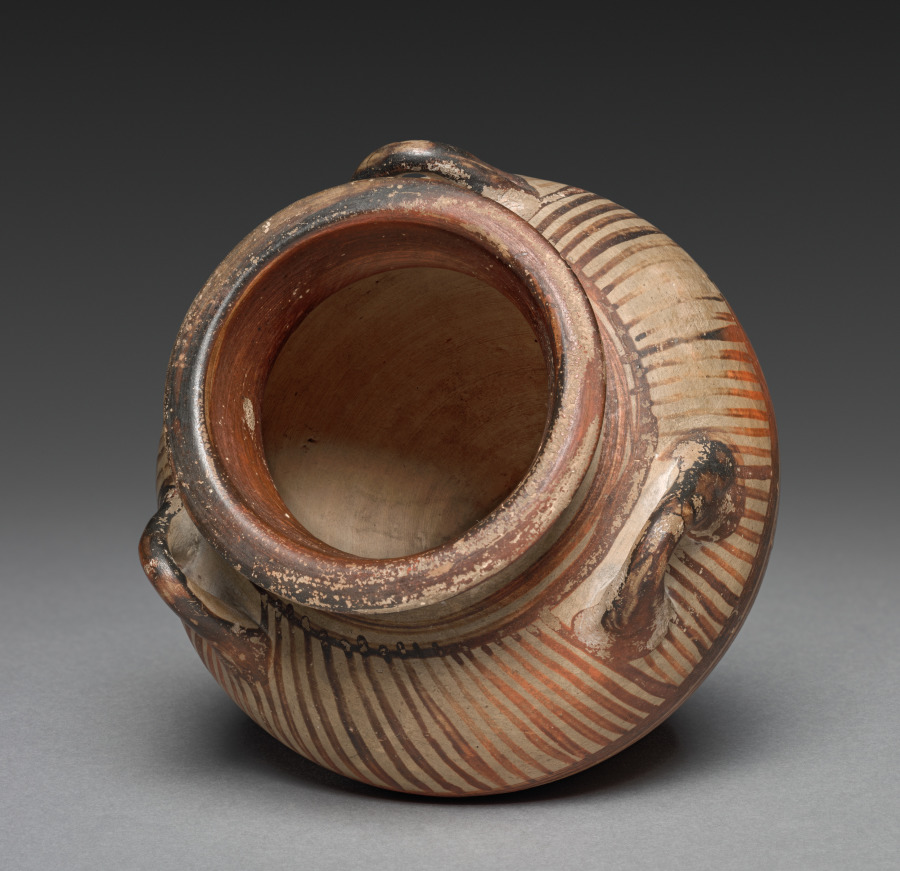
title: Three Handled Jar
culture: Cyprus, late Helladic III A1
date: c. 3200–c. 1050 BCE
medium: ceramic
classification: Ceramic